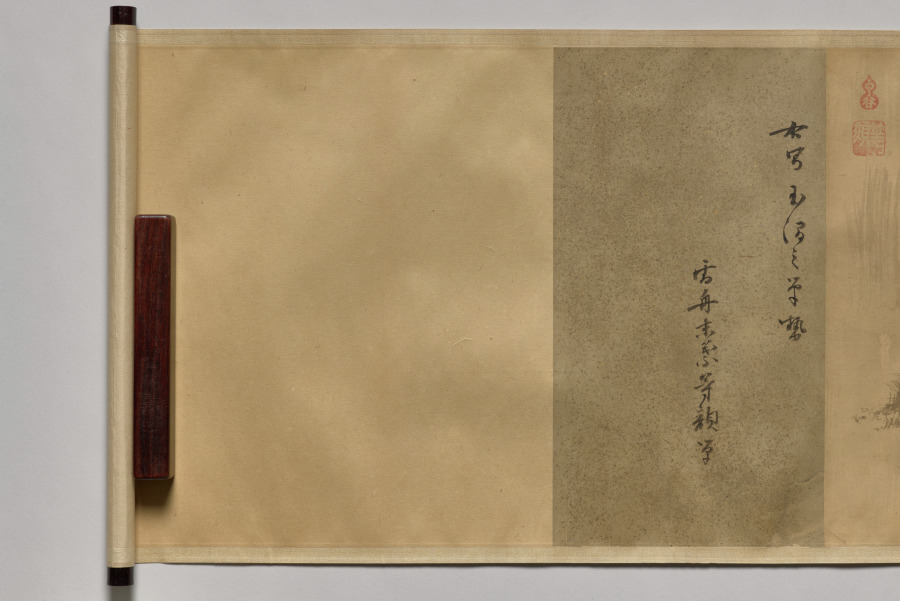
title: Poems and Pictures of the Eight Views of Xiao-Xiang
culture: Japan, Momoyama period (1573–1615)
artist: Unkoku Tōgan (Japanese, 1547–1618)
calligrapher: Inkei Gentetsu (Japanese, 1562–1612)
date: 1605–12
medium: Handscroll; ink on paper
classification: Painting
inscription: Each painting sealed with red gourd-shaped seal reading Unkoku (雲谷) and a square seal reading Tōgan (等顔).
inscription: Each painting prefaced with a titled poem on the Eight Views of Xiao-Xiang by Yujian Ruofen (active late 13th century) inscribed by Japanese Buddhist monk Inkei Gentetsu (1562–1612).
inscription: 右寫玉㵎之筆勢／雪舟末葉等顔筆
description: Unkoku Tōgan brushed these scenes using the splashed-ink technique associated in Japan with the Chinese monk Yujian Ruofen (active late 1200s). Xiao-Xiang refers to the region in present-day Hunan province, where the Xiang River and its tributaries converge. Each of the eight views evokes a time of day or season. The earliest surviving series of Xiao-Xiang paintings is by Wang Hong (active mid-1100s), but textual evidence tells us the theme appears earlier. It was later adopted in Japan and Korea, as seen here. The poems were inscribed by Inkei Gentetsu, the third abbot of the Rinzai Zen temple Tōshunji, Japan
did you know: The “Tō” of Tōgan comes from the name of painter Sesshū Tōyō (1420–1506).